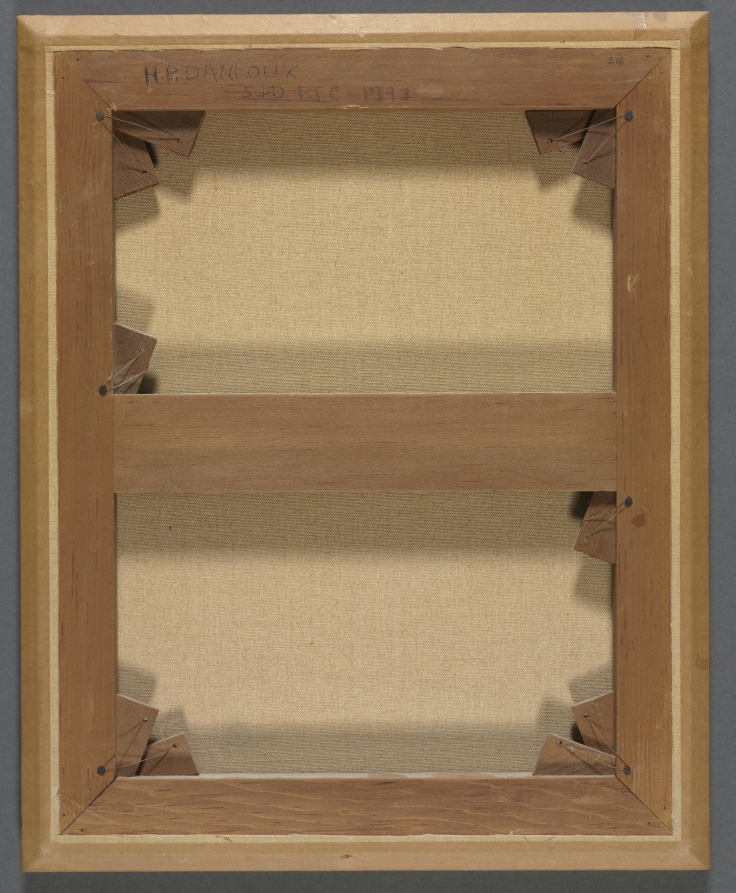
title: Portrait of a Mother and Daughter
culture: France, 18th century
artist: attributed to Henri-Pierre Danloux (French, 1753–1809)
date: c. 1794–95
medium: oil on canvas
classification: Painting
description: Though flowing loose and free across her shoulders, the woman’s hair is partly bound up in a red kerchief, a tell-tale sign she is an active participant in the French Revolution. The painting also celebrates primary values of the Revolutionary period--close family bonds and, especially, the mother’s role in raising children--by depicting an intimate connection between mother and daughter.